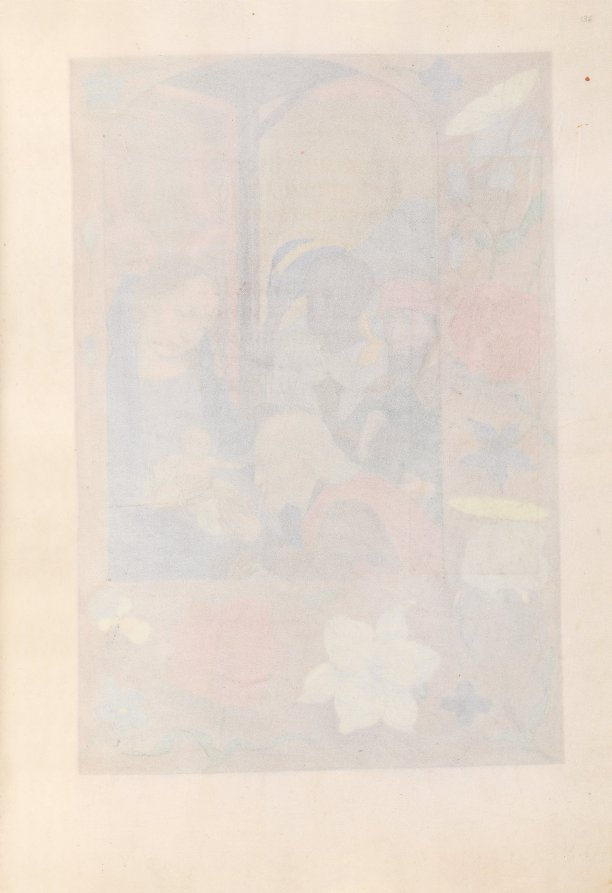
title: Hours of Queen Isabella the Catholic, Queen of Spain: Fol. 136r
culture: Flanders, Ghent and Bruges, late 15th century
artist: Master of the First Prayerbook of Maximillian (Flemish, c. 1444–1519)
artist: and Associates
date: c. 1500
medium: ink, tempera, and gold on vellum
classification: Bound Volume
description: This manuscript was illuminated by a circle of at least five highly organized manuscript painters active in the Flemish cities of Ghent and Bruges. The principal illuminator was Alexander Bening, who painted the majority of the book's miniatures. Manuscripts produced by this circle of artists are renowned for the decoration of their borders, which typically feature a rich variety of realistically-painted flowers, birds, and butterflies. This prayer book, called a book of hours, was intended not for a cleric, but for the private devotions of a lay person-in this case, Isabella the Catholic, Queen of Spain (1451-1504). Isabella's coat of arms embellishes the book's frontispiece. It is unlikely that the book was commissioned by the Queen herself; rather, she probably received it as a diplomatic gift from someone courting her patronage, perhaps Cardinal Francisco Jimenez de Cisneros. A Franciscan friar, Jimenez was dependent upon Isabella for his advancement, first to the post of Queen's confessor in 1492, and then to Archbishop of Toledo in 1495.